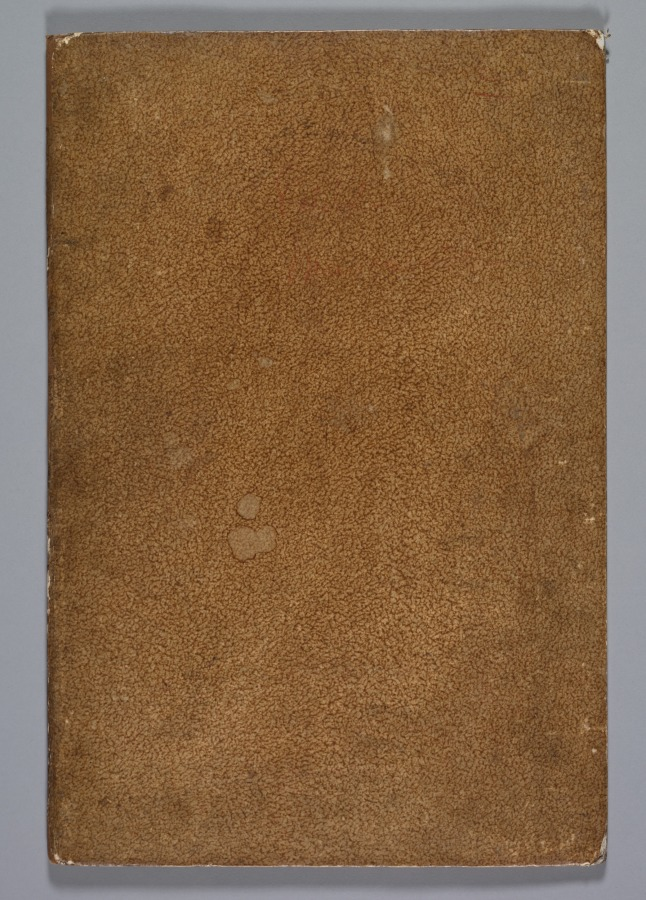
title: Mascarade à la Grecque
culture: Italy, 18th century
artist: after Benigno Bossi (Italian, 1727–1792)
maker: Ennemond Alexandre Petitot (French, 1727-1801)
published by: Benigno Bossi, Parma, 1771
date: 1771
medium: Set of 10 etchings, including the title page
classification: Print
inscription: On paper pasted to inside left cover: Upper left corner: red sticker, printed in white: LIBRAIRIE ARTISTIQUE & LITTERAIRE PARIS; FOULARD / 7 QUAI MALAQUAIS; white sticker, center, printed in red ink with green border: Charlotte and Arthur Vershbow; upper left corner, in black ink: 1800 / Francesco Tasta Vicenzio (sp?); upper right, in black in: 82-59-6; upper right, heart-shaped stamp in red ink; center, in brown ink: Armaro On paper opposite inside left cover, in graphite, two different handwritings: Bossi / 11 sheets / 1771 Bossi - Petitot / Mascarade à la grecque / Parma 1771 / original binding / 18th cent paste - paper / this is the first edition / a later edition was published with "Milano" on the title page / ref: Berlin 475 / Guilmard p. 225 / Lippenheif (sp?) 3560 / Estas 2234 / Cohen 70 178 "livre rare" / Le Blanc 186 - 205